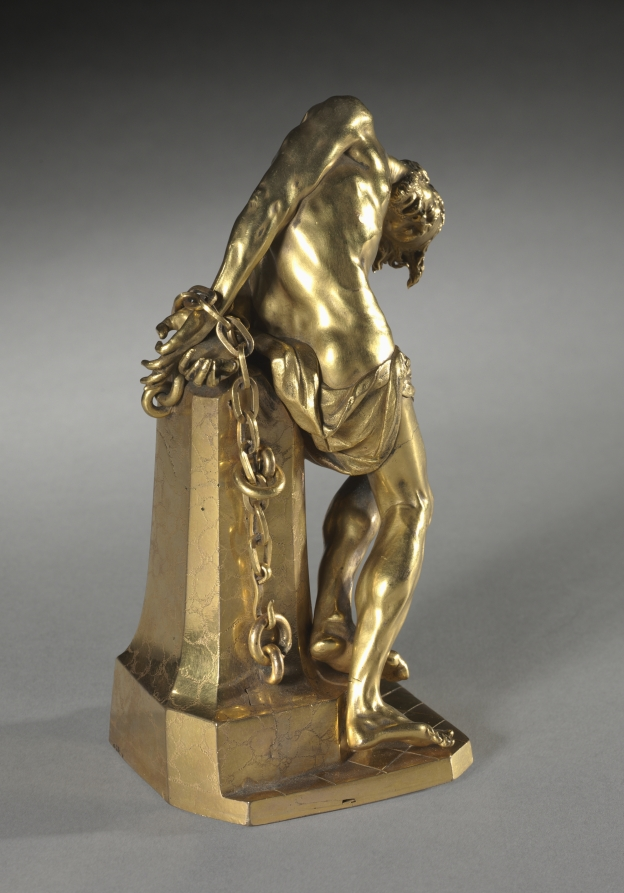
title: Christ at the Column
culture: Austria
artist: Johann Baptist Hagenauer (Austrian, 1732–1810)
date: 1756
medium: gilt bronze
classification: Sculpture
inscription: at base of stake: IOANNES HAGENAUER SALISBURGENSIS INVENIT ED FECIT 1756.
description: Considered to be one of the masterpieces of his youth, Hagenauer cast this bronze while a student at the Vienna Academy, where he studied between 1754 and 1759. The authorship and date is verified by an inscription found at the base of the stake: IOANNES HAGENAUER SALISBURGENSIS INVENIT ED FECIT 1756. This signature appears on several of Hagenauer's early works.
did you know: With the energy of the imbalanced composition, Hagenauer emphasizes this heightened moment of the Passion of Christ.